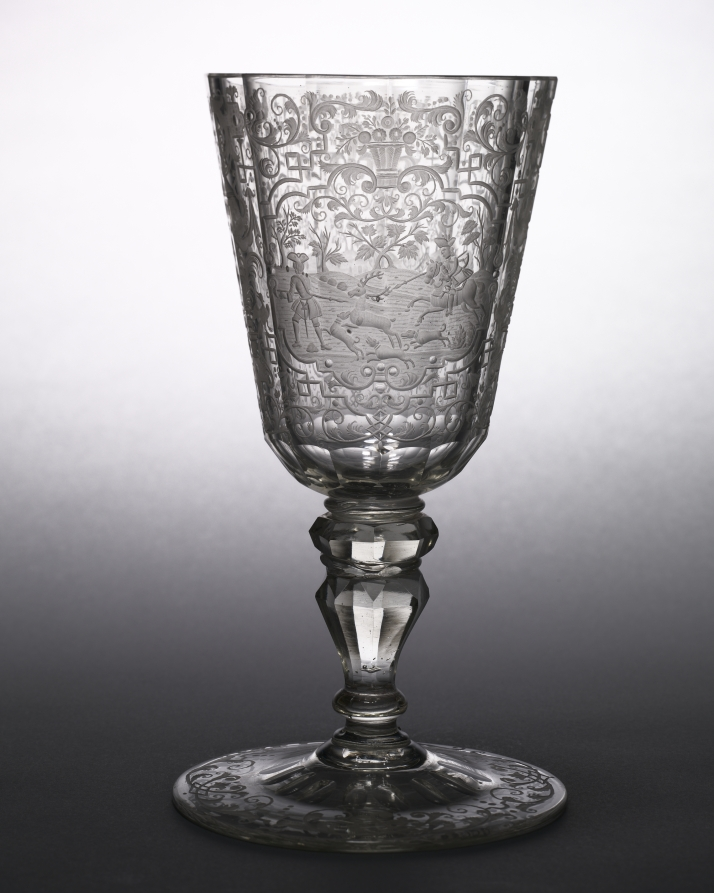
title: Cup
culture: Bohemia, 18th century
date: c. 1720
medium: glass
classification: Glass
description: This substantial drinking vessel was used for a variety of alcoholic beverages. Bohemian glass gained immense popularity throughout Europe’s courts in the late 1600s and early 1700s. Bohemia (present-day Czech Republic) had abundant natural resources, including potassium-rich minerals that, when combined with chalk, created clear glass that was remarkable for its stability. Glassmakers from the region became experts at hand cutting and engraving glassware, as in this example featuring a boar hunt amid elaborate ribbonlike motifs, or strapwork, and floral designs.